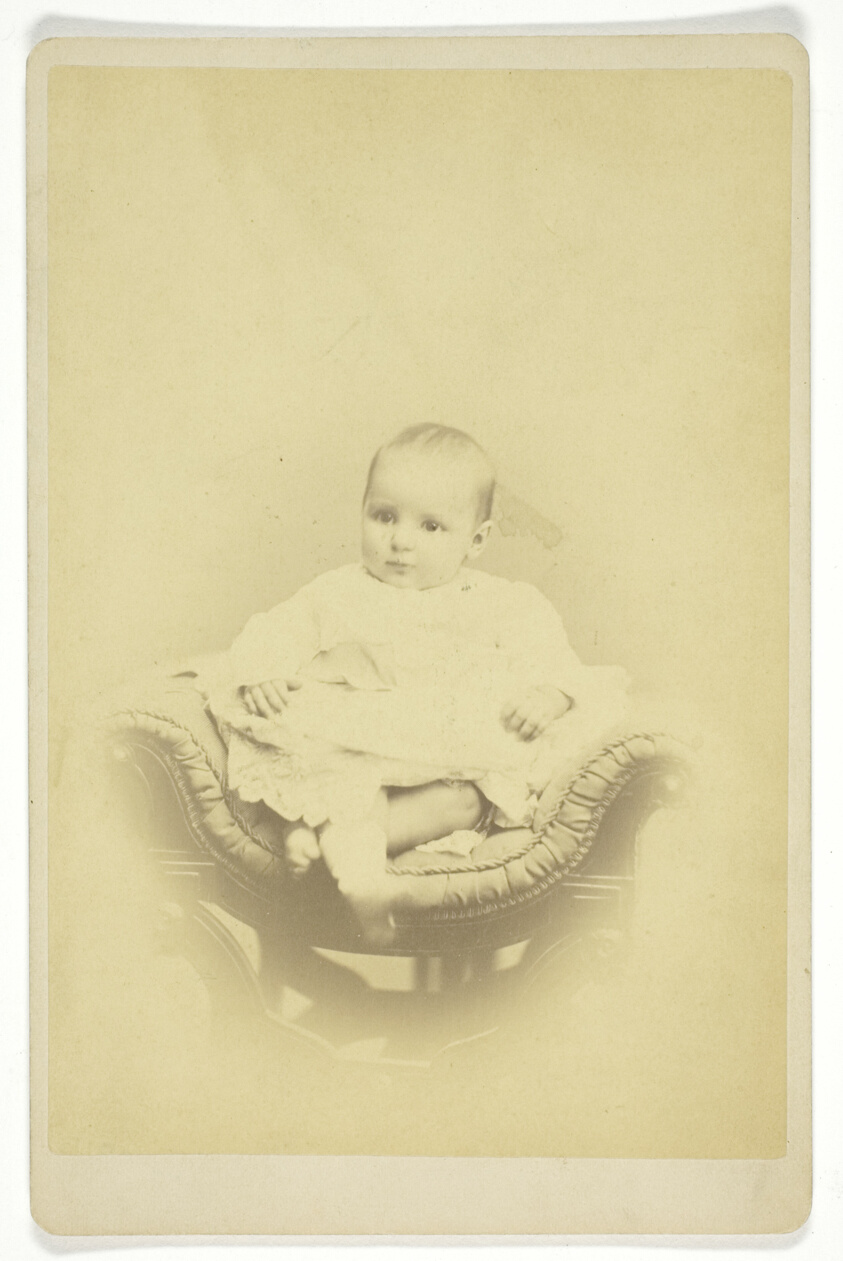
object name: Photograph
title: Untitled (Portrait of Seated Infant)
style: 19th century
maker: S. A. Thomas; America, 19th century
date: 1850/1899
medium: Albumen print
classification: photography; photograph